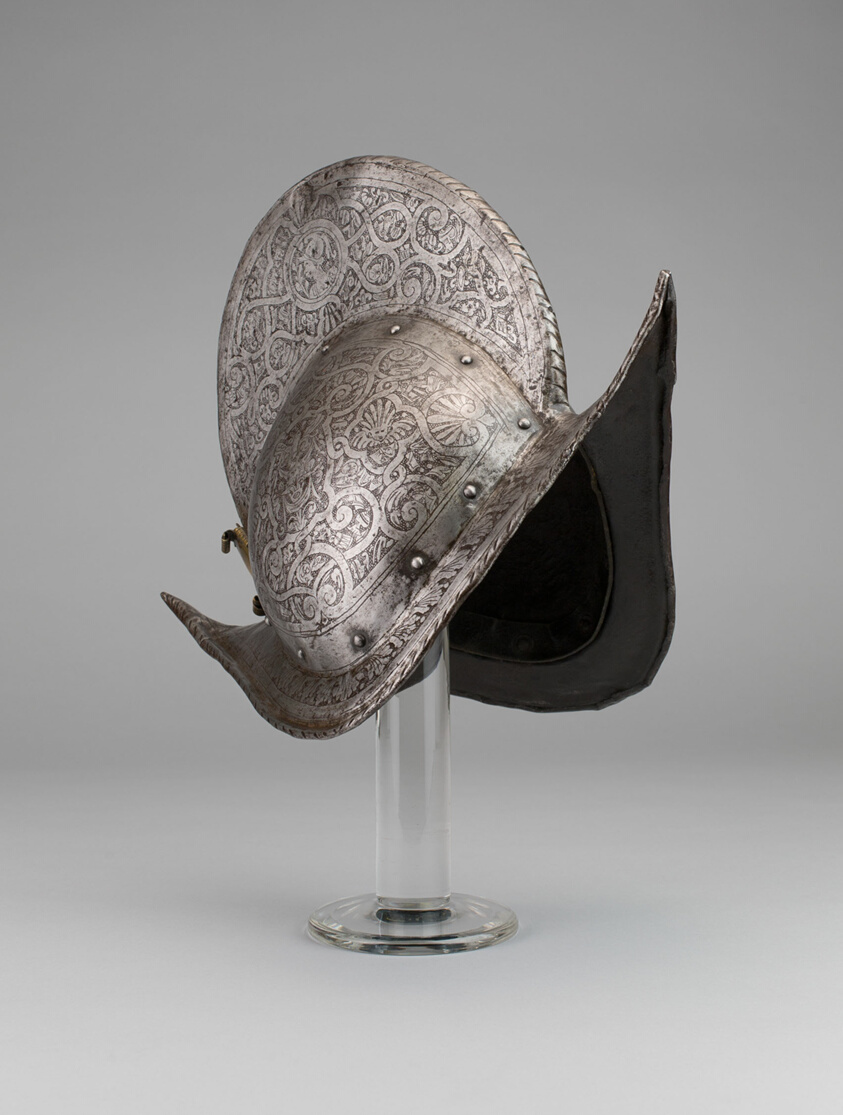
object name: Armor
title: Comb Morion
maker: French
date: 1570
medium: Steel, iron, brass, and leather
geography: France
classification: suit-helmet; armor; arms and armor